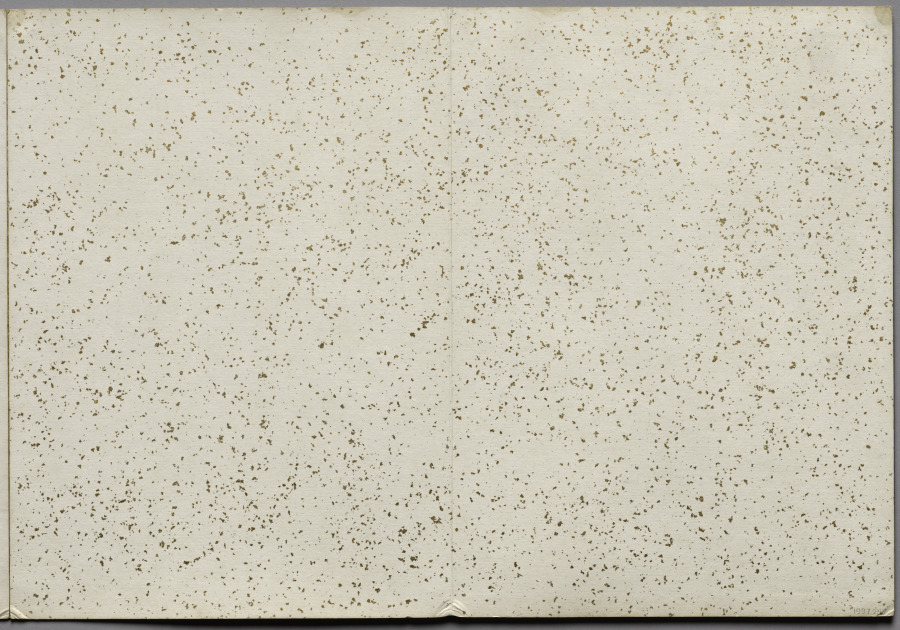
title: Album of Paintings by Haizan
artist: Yoshitsugu Haizan (Japanese, 1846–1915)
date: late 1800s-early 1900s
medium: double-sided accordion album; ink and color on paper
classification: Bound Volume